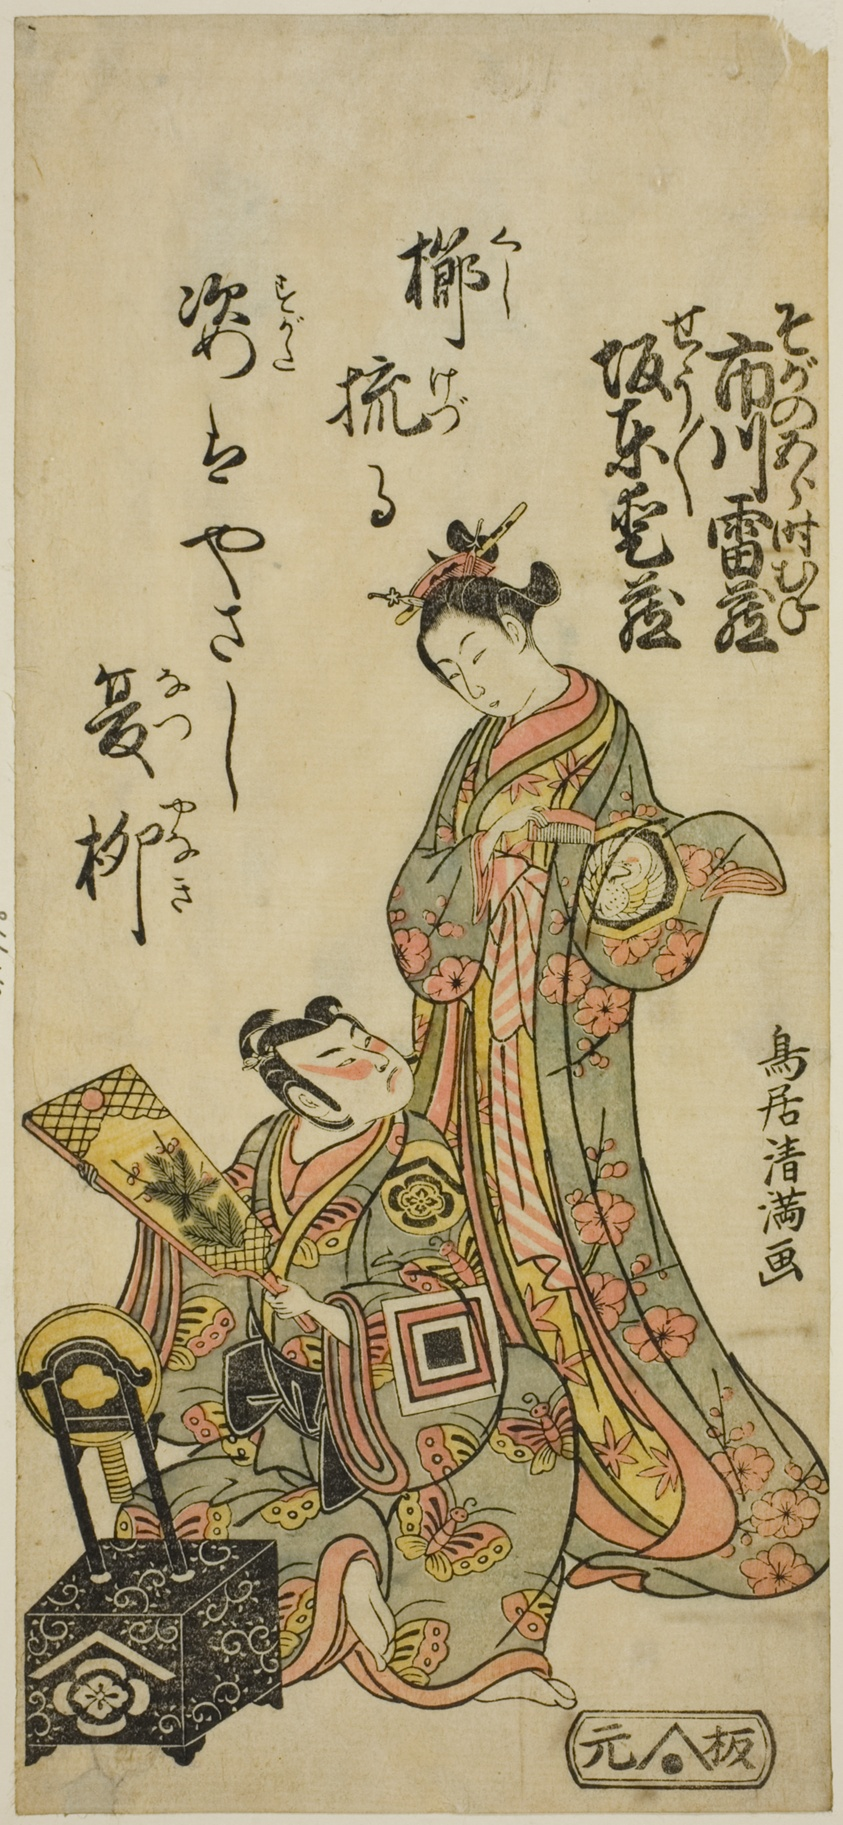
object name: Print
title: The Actors Bando Aizo as the courtesan Kewaizaka no Shosho and Ichikawa Raizo I as Soga no Goro in the play "Satsuki Matsu Unohana Soga," performed at the Morita Theater in the fourth month, 1766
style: Japanese (culture or style)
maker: Torii Kiyomitsu I (Japanese, 1735–1785)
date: 1766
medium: Color woodblock print; hosoban, benizuri-e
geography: Japan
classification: woodblock print; print; asian art